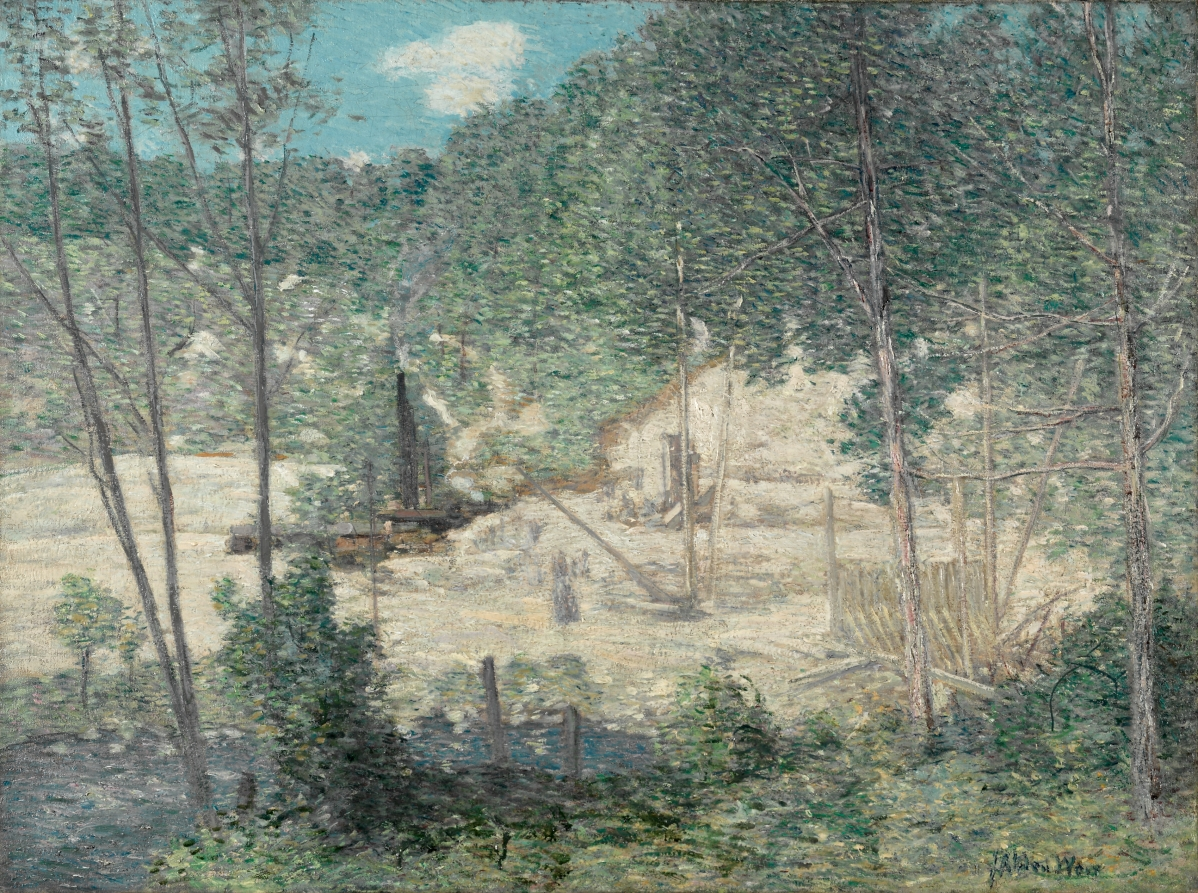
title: The Building of the Dam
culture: America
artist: Julian Alden Weir (American, 1852–1919)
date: 1908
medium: oil on canvas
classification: Painting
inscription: Signed lower right: "J. Alden Weir"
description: Julian Alden Weir's painting shows the construction of the Scotland Dam, built between 1907 and 1909 on the Shetucket River near his summer home in Windham, Connecticut. The artist had a vested interest in the subject, as the dam ensured an energy supply to the area's inhabitants that included his family.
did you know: The artist was the 14th of 16 children born to his parents.